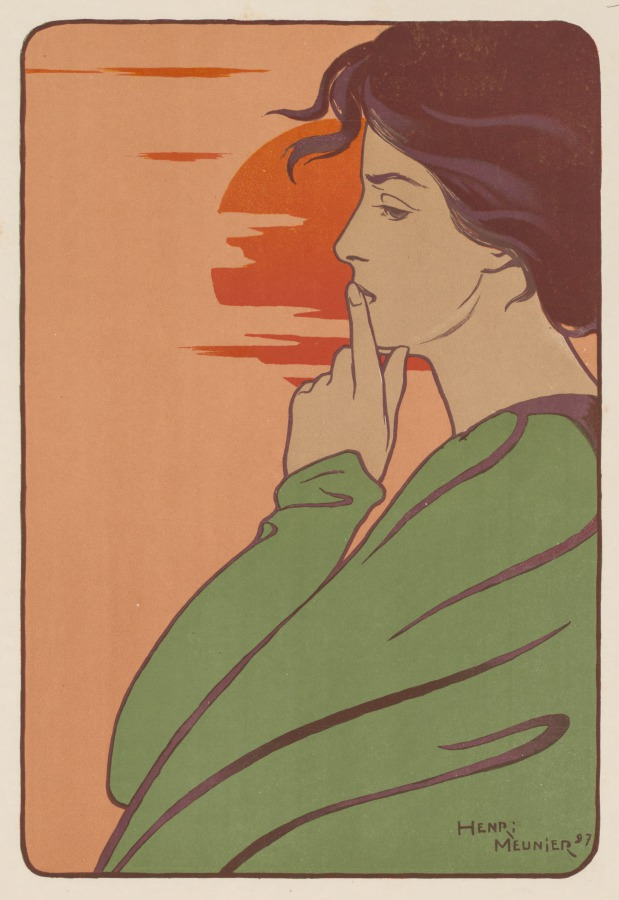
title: L'Heure du silence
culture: Belgium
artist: Henri Georges J. I. Meunier (Belgian, 1873–1922)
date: 1897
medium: color lithograph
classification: Print